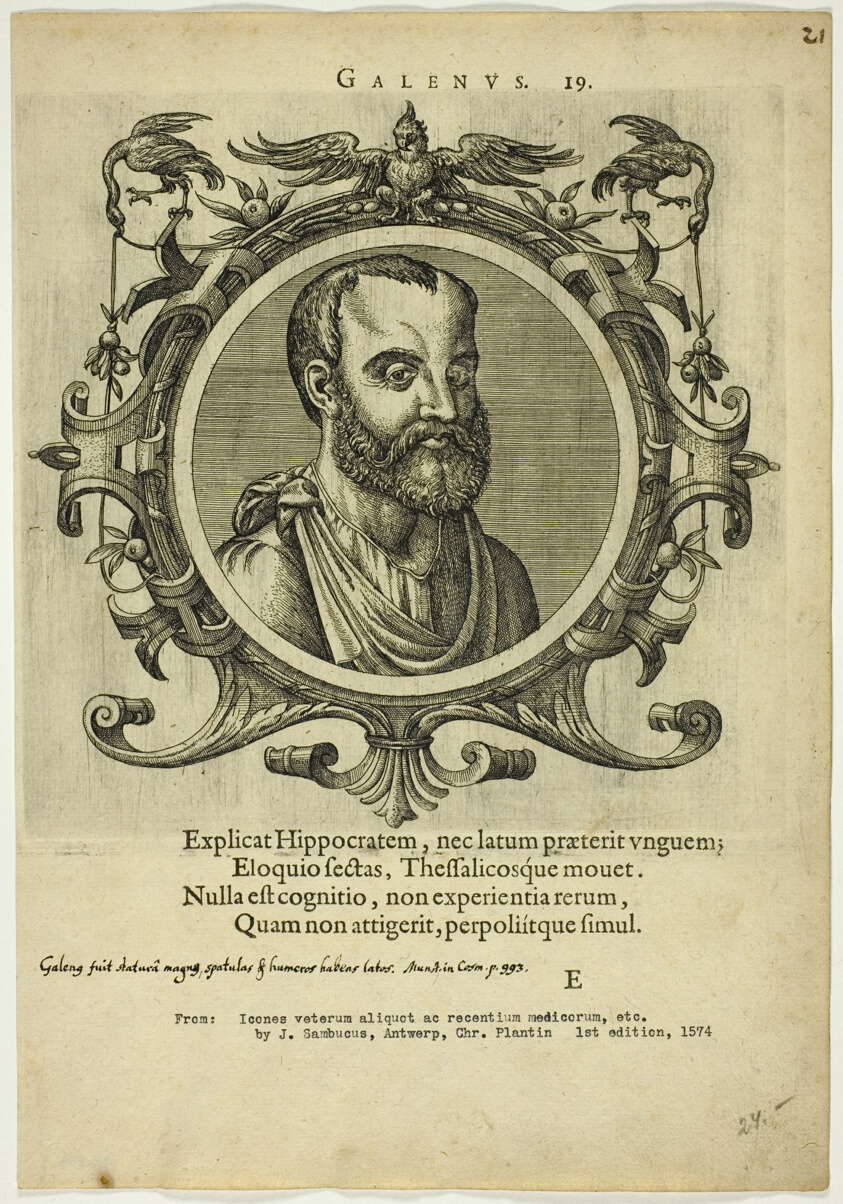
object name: Print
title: Portrait of Galenus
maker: Unknown Artist (Flemish); written by Johannes Sambucus (Flemish, 1531-1584)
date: published 1574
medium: Etching, with engraving, on cream laid paper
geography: Flanders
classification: etching; print; prints and drawing